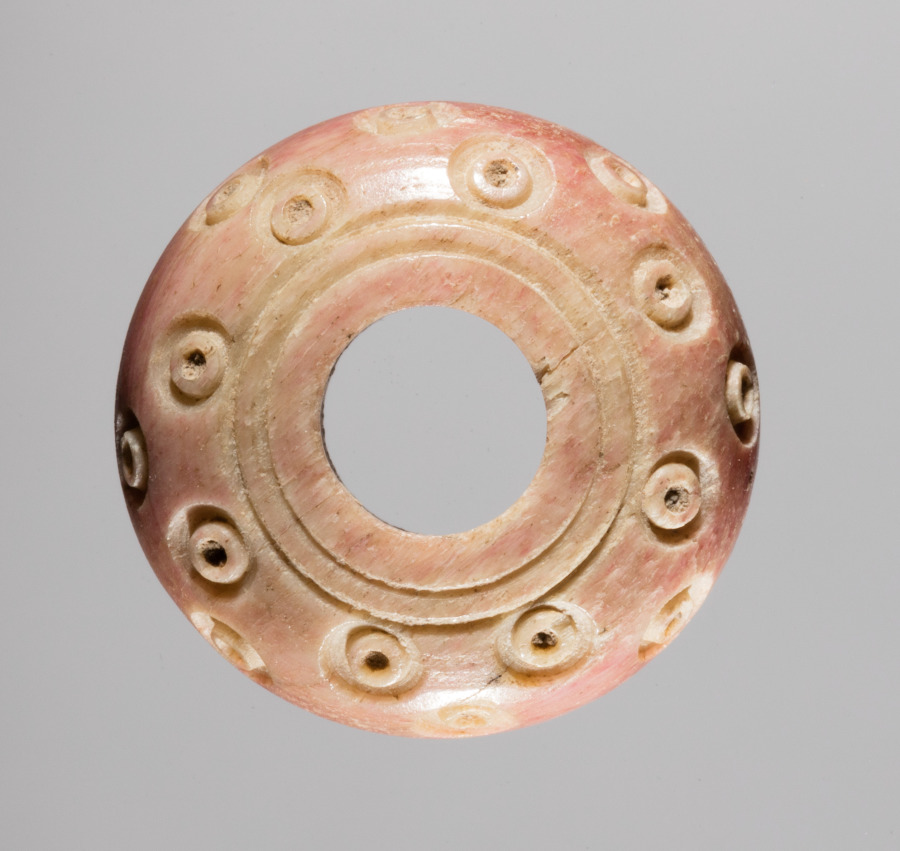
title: Spindle Whorl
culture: Iran, early Islamic period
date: 700s - 900s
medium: bone, incised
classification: Spindle Whorl